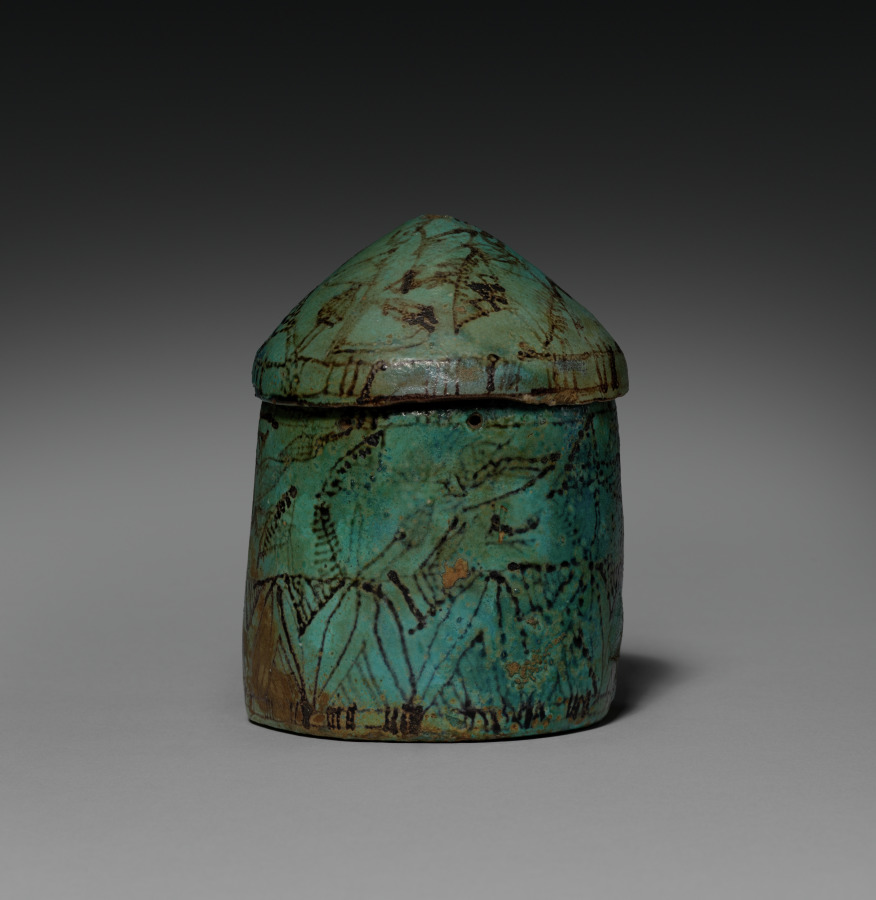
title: Pyxis with Lid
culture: Egypt, Middle Kingdom (2040–1648 BCE)–New Kingdom (1540–1069 BCE)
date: c. 1901–1525 BCE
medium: turquoise faience with black decoration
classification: Vessels